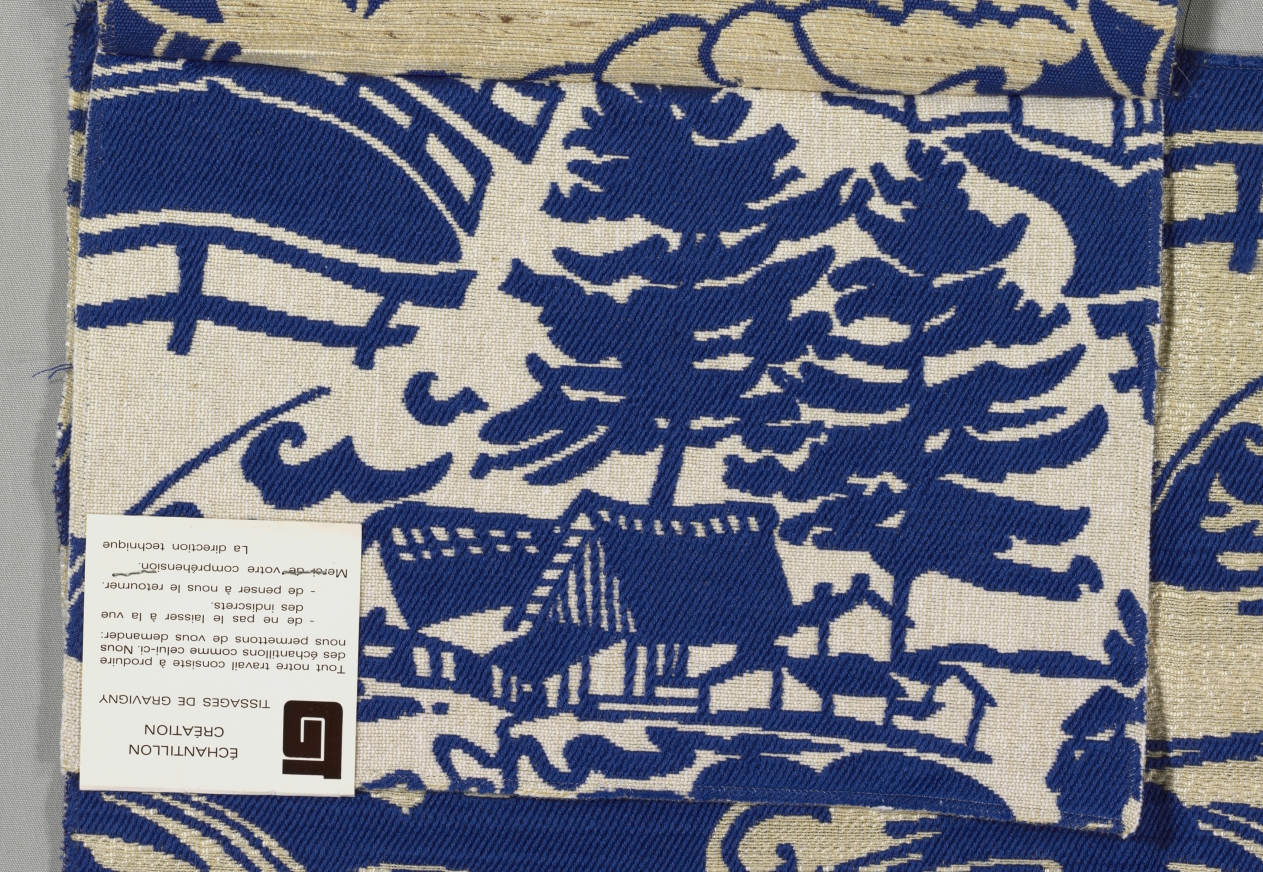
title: Showroom Sample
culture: France, Normandy, 20th century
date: 20th century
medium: damask weave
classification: Textile